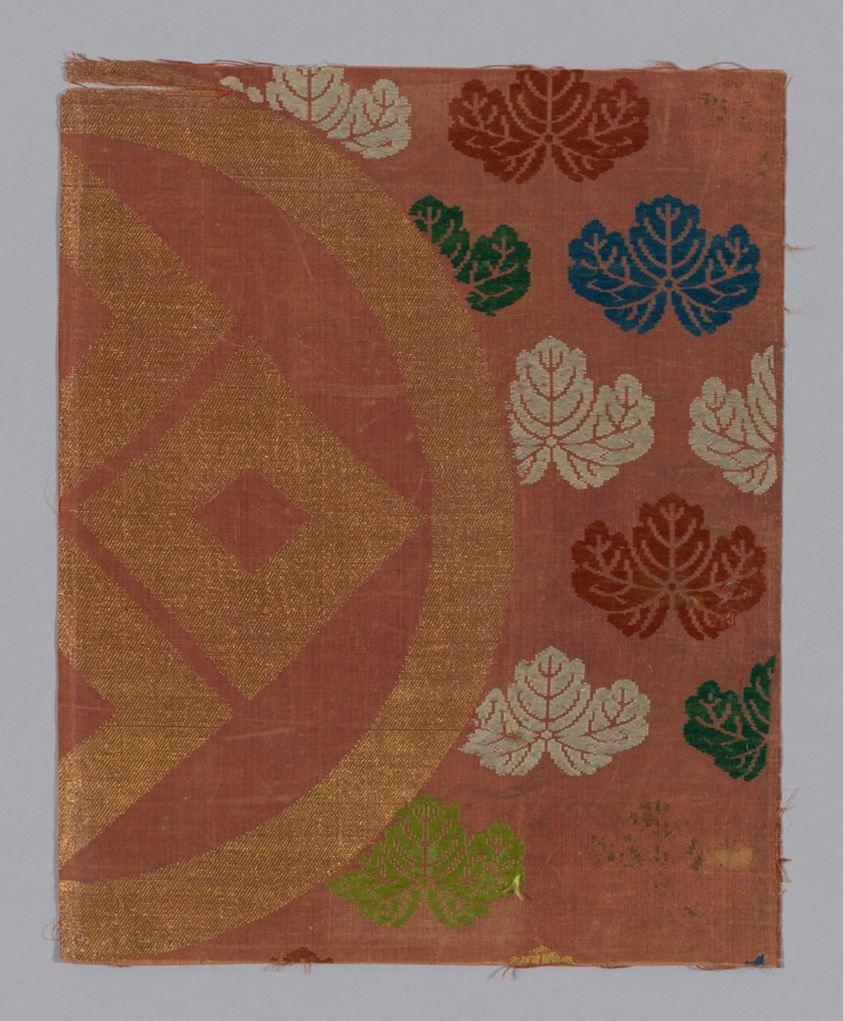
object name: Textile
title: Fragment (from Noh Costume)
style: edo (japanese period)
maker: Japan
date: Edo period (1615– 1868), 1675/1725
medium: Brocaded twill (kara ori) silk and gilt paper; 2 1/2 strips to m.m.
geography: Japan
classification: weaving; textile